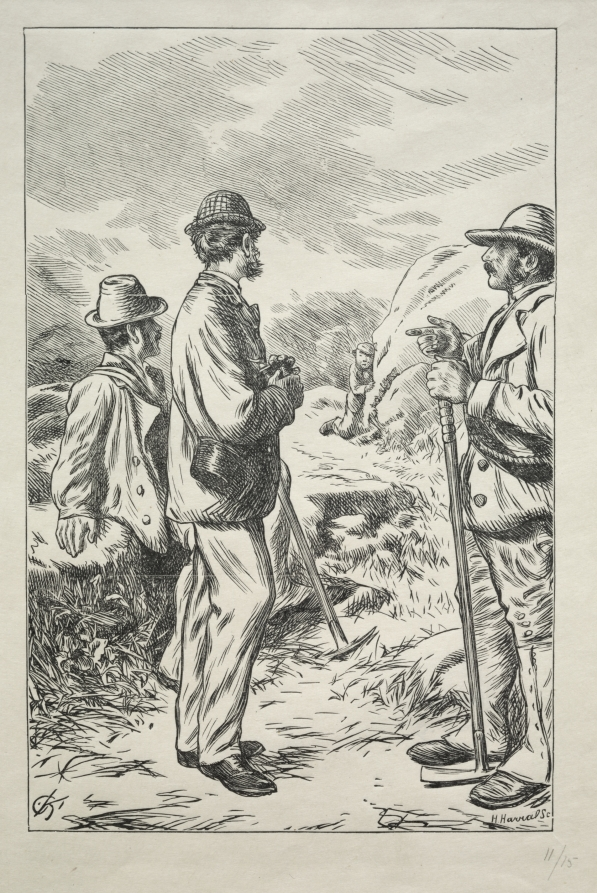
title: The Three Names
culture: England, 19th century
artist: Charles Samuel Keene (British, 1823–1891)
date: 1869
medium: wood engraving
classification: Print